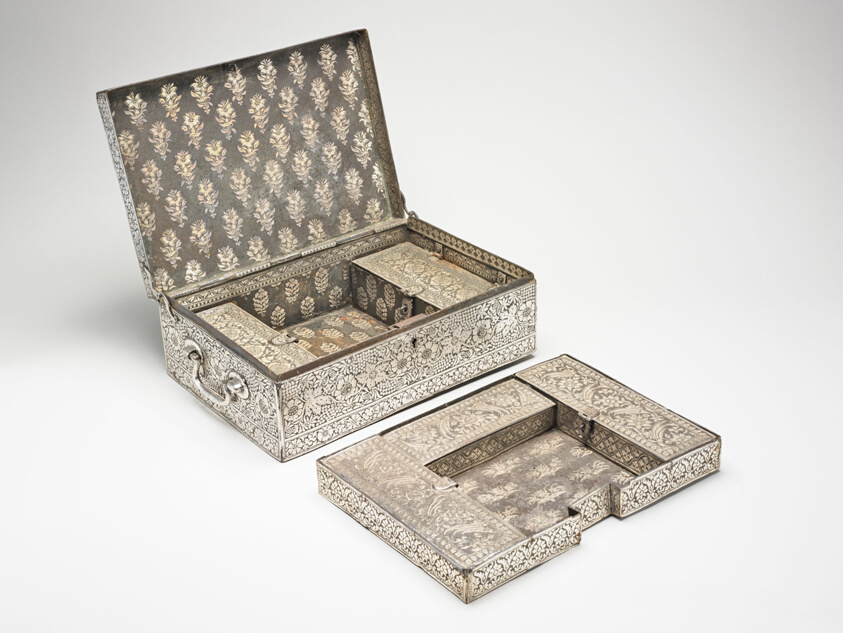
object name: Decorative Arts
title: Fitted Chest with Floral and Grape-Leaf Motifs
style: South Asian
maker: India; Deccan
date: 18th/19th century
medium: Iron inlaid with silver in the kuftgari technique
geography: India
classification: steel; metalwork; asian art; decorative arts